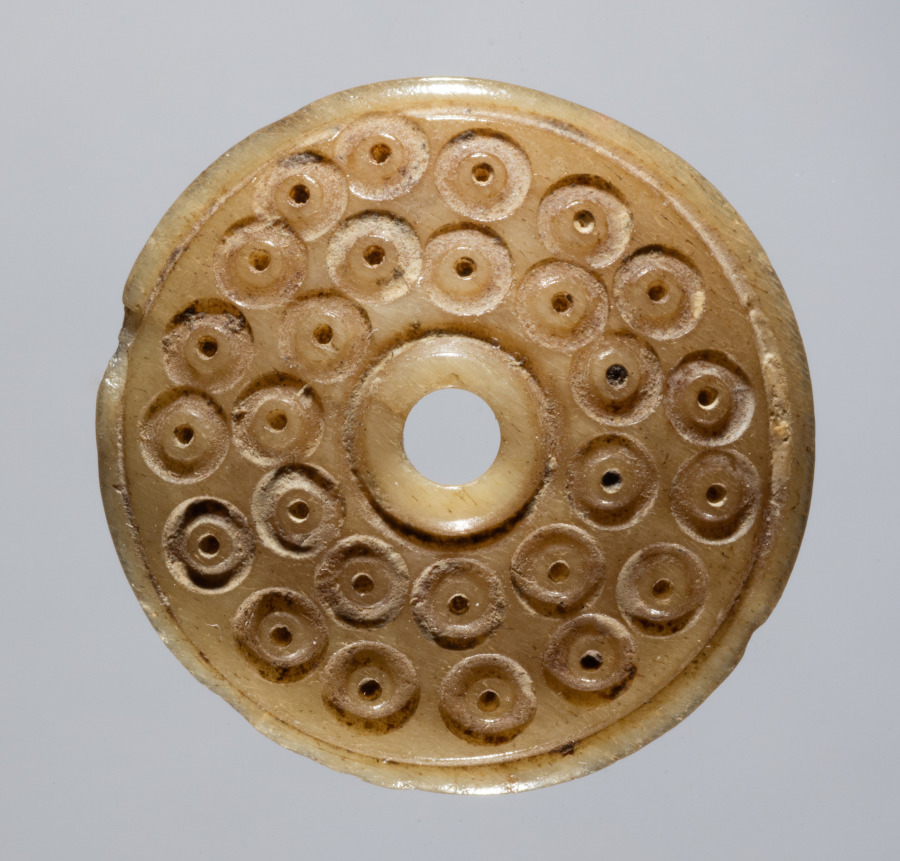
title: Spindle Whorl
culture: Iran, early Islamic period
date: 700s - 900s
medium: bone, incised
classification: Spindle Whorl